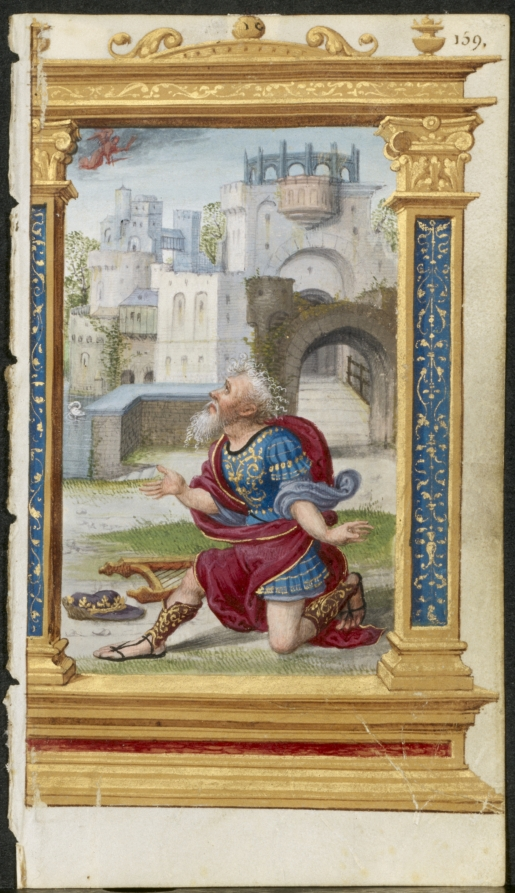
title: Leaf from a Book of Hours: King David in Prayer (2 of 3 Excised Leaves)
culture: France, 16th century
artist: Noël Bellemare (French, d. 1546)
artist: The 1520s Hours Workshop (French)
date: c. 1530–35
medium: ink, tempera and liquid gold on vellum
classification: Manuscript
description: The 1520s Hours Workshop produced luxury books of hours for a wealthy, often royal, clientele. Recent evidence points to Paris as the site of the workshop’s activity under the direction of Antwerp-born miniaturist Noël Bellemare (died 1546). Containing fuschia pinks and bright acid greens, the palette is unusual in French manuscript painting of the period. Instead, Bellemare’s miniatures point directly to Antwerp painting at the time.